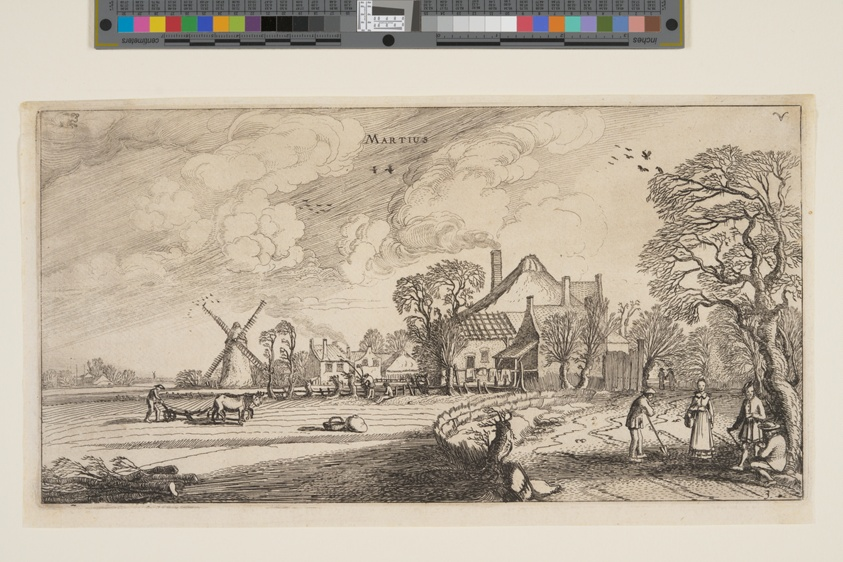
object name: Print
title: March, from The Twelve Months of the Year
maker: Jan van de Velde II (Dutch, c. 1593–1641); after Willem Buytewech (Dutch, c. 1591–1624)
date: 1616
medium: Etching on ivory laid paper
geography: Netherlands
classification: etching; paper; print; prints and drawing